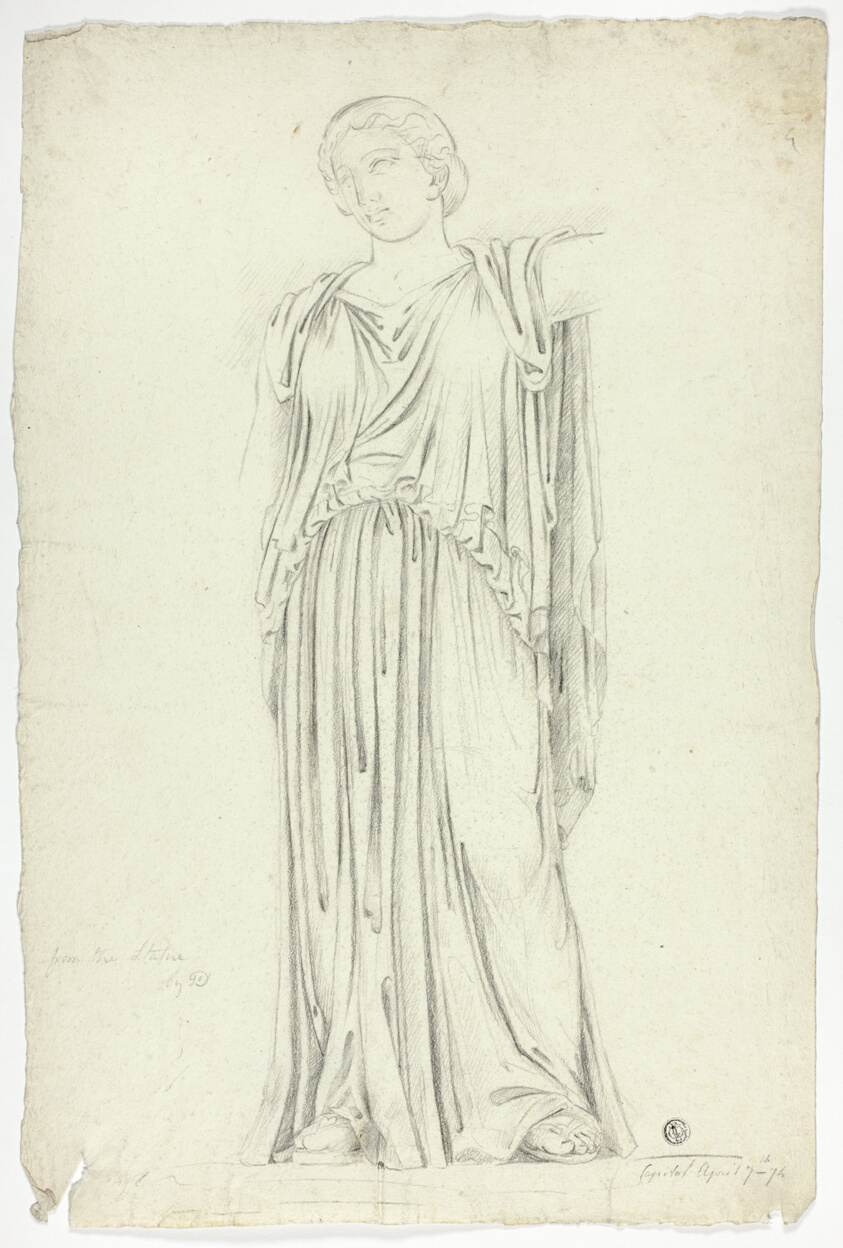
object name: Drawing and Watercolor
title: Antique Statue of Draped Standing Woman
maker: John Downman (English, 1750-1824)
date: 1774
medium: Charcoal on ivory laid paper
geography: England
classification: crayon; drawings (visual works); prints and drawing